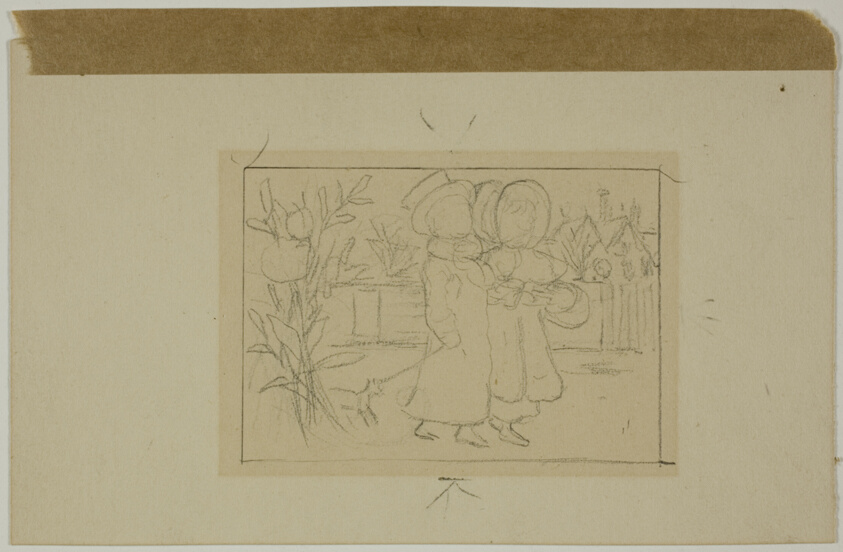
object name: Drawing and Watercolor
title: Two Figures Walking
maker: Kate Greenaway (English, 1846-1901)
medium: Graphite on cream wove paper (discolored to tan)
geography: England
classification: graphite; drawings (visual works); prints and drawing